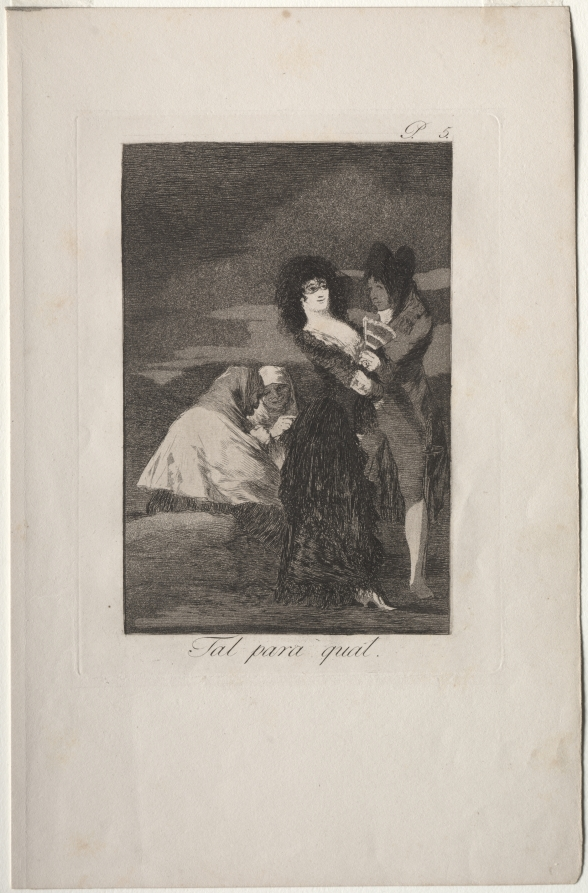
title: Two of a Kind, Plate 5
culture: Spain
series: Los Caprichos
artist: Francisco de Goya (Spanish, 1746–1828)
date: 1799, printed c. 1855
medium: etching and aquatint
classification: Print